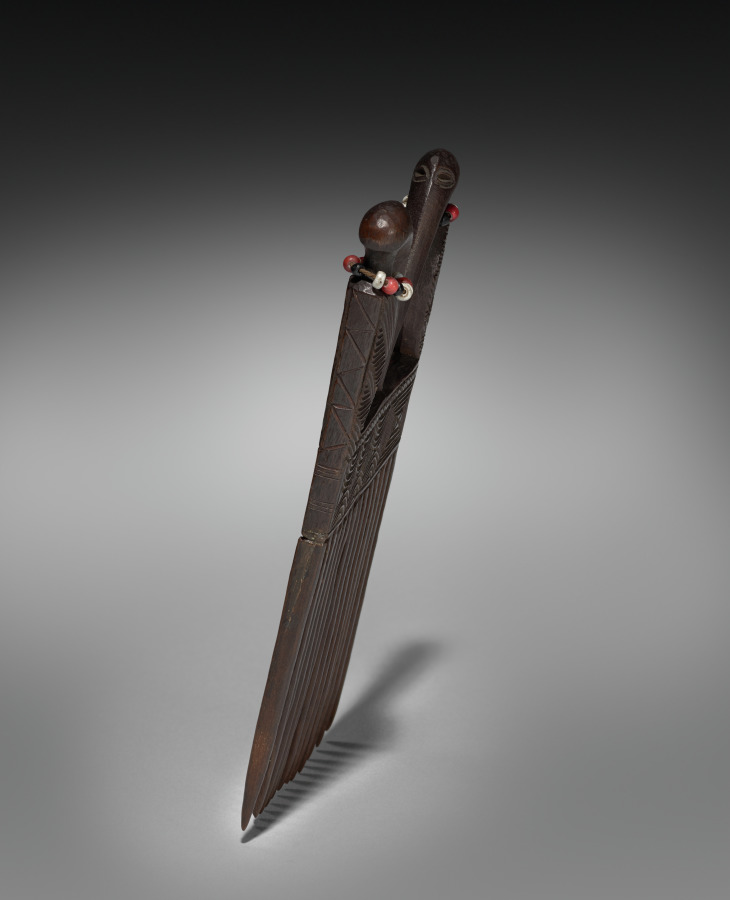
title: Comb (cisakulo)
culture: Africa, Central Africa, Angola, or Democratic Republic of Congo, Chokwe-style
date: mid- to late 1800s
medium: Wood, glass beads, and natural fibers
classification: Jewelry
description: Chokwe women and men inserted finely decorated combs and pins in their hair to signal rank and wealth. Here, as among neighboring peoples, hairstyles reflected changing trends across place and over time. This comb's wooden material and sculptural top made it of a higher value than simple examples made from metal or cane. Its wide teeth were practical, securing elements of a hairstyle in place. The long-beaked ngungu birds with beaded necklaces were a well-known symbol of chiefly power. In addition to being a sign of beauty and good health, a well-styled hairdo also suggests that the wearer relies on the help of others in its creation. Combs were often gifted to women by admirers or husbands to mark important life events. This comb entered the Cleveland Museum of Art's collection in 1915, one year before the museum opened its doors.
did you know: The double birds on this comb are the ngungu, a kind of hornbill linked to hunting and the related power of leaders. They were considered a good omen, and served as mediators between the earthly world and the spiritual one.